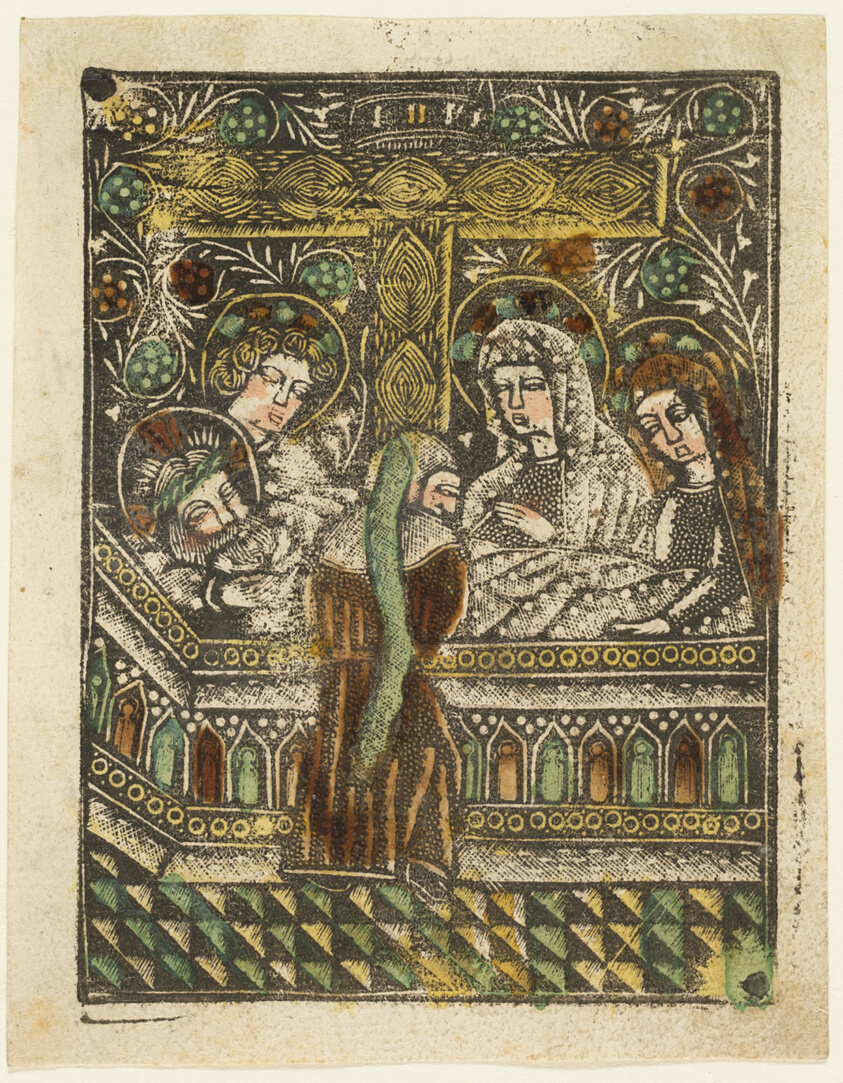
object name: Print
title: The Deposition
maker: Artist unknown; Bavarian, 15th century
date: 1460–65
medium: Metalcut in black hand colored with brush and watercolor in yellow, red-brown lake, and green, on ivory laid paper, with manuscript text in pen and brown ink on verso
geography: Germany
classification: dotted/metal cut; book; prints and drawing; print